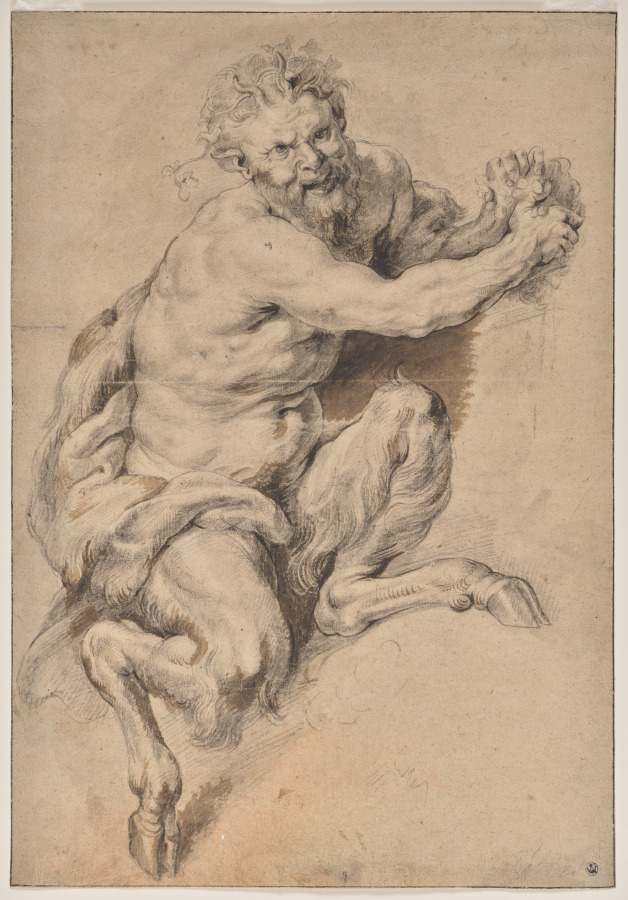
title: A Faun Grasping a Bunch of Grapes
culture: Flanders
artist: studio of Peter Paul Rubens (Flemish, 1577–1640)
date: after 1616–18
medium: black chalk and brush and brown wash; framing lines in pen and black ink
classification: Drawing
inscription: VERSO, upper right, in brown ink: no 40 ; lower left, in brown ink: 6/14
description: This drawing relates to a finished painting (now lost) by Peter Paul Rubens that depicted a faun (a woodland creature similar to a satyr) squeezing grapes into the mouth of a young Bacchus. That figure, shown here, could be Silenus, who educated Bacchus on the pleasures of wine, revelry, and nature. Rubens ran a large studio and employed numerous apprentices, one of whom may have made this copy after the original painting. As a form of instruction, Rubens added ink wash to the drawing to enhance the shading on the figure and shadows behind it.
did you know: Swirling draperies like the one haphazardly worn by this faun do more than conceal, in many cases they reveal an artist's technical skill. To render folds and gathers in fabric, artists used chiaroscuro, meaning contrasting light and dark tones.